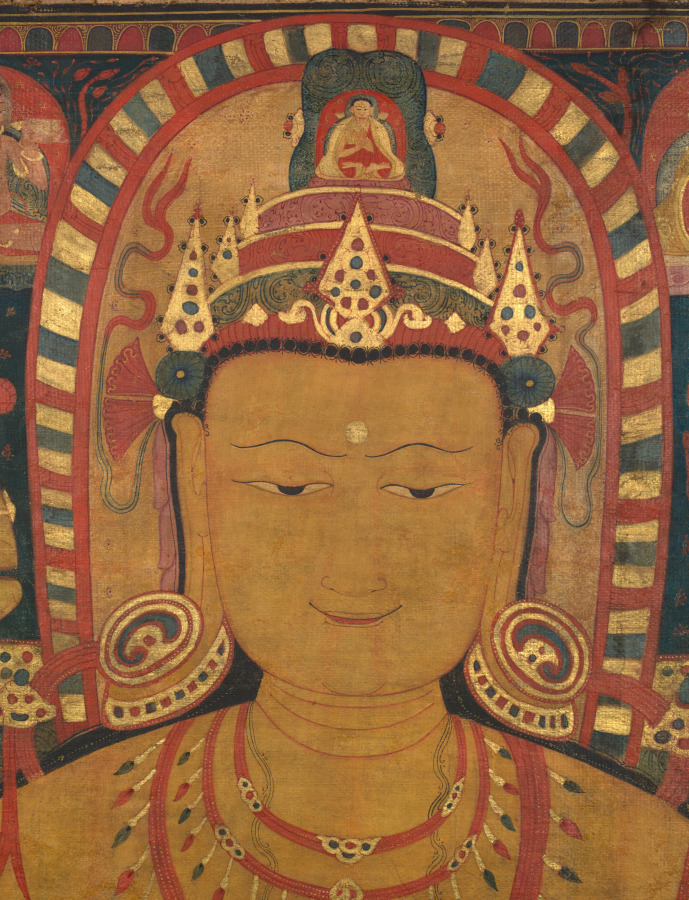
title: Tantric Buddha Vairochana as Vajrasattva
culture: Central Tibet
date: c. 1150–1200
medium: gum tempera, ink, and gold on cloth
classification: Painting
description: The seated Buddha dominating the composition is identified as Vairochana because of his hand gesture, the mudra communicating supreme enlightenment in which the index finger of one hand is grasped by the fingers of the opposite hand. His golden color and the tiny vajra—a six-pronged ritual object representing a thunderbolt—balanced on top of his finger suggest that he is in the guise of Vajrasattva, the summation of all enlightened beings. In his crown is the image of a monk, who is probably the guru of the donor, the small monastic figure at the lower right next to the lotus pedestal.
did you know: A mantra written behind the figures invokes their living presence in the thangka painting.